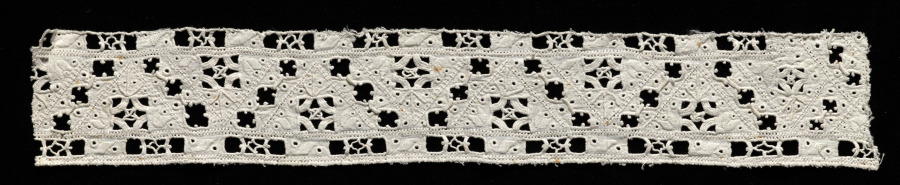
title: Lace fragment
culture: Italy, Venice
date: 1500s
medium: Linen: needle lace (cutwork) insertion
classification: Lace